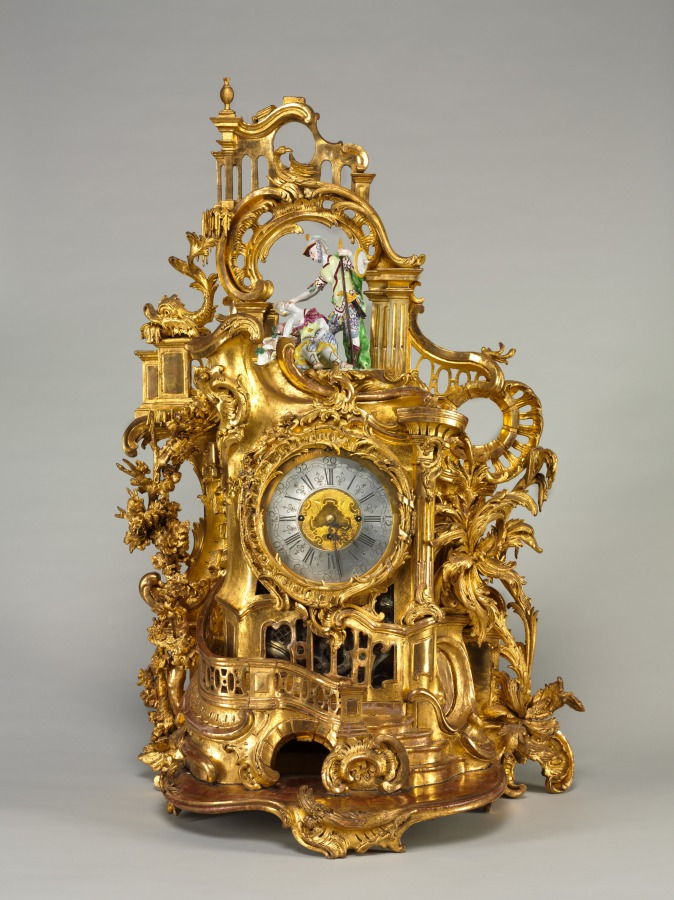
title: Clock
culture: Germany, 18th century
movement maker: Baumgartinger (German)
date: c. 1750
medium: carved and gilded wood, faience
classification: Furniture and woodwork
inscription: inscribed on face: Baumgartnger [sic] Mergentheim.